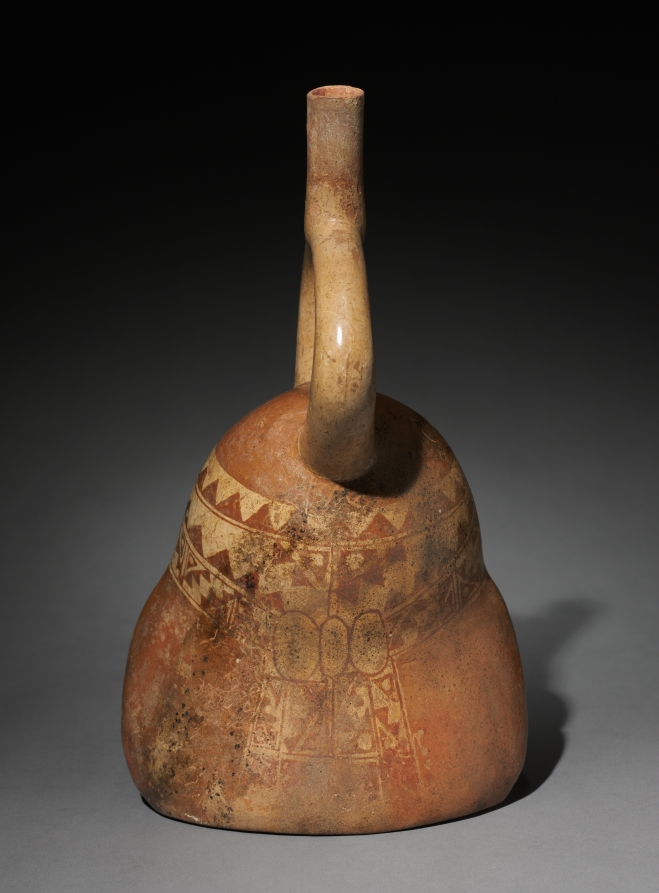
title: Portrait Head Vessel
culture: Peru, North Coast, Moche style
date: c. 200–550 CE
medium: earthenware with colored slips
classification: Sculpture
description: The Moche were unique in ancient Peru in creating realistic human portraits, usually in the form of ceramic vessels. In general, such vessels represent more than 750 individuals; identities are unclear but most are elite men, some probably rulers. The stirrup-shaped spout is a hallmark of Moche ceramic production.